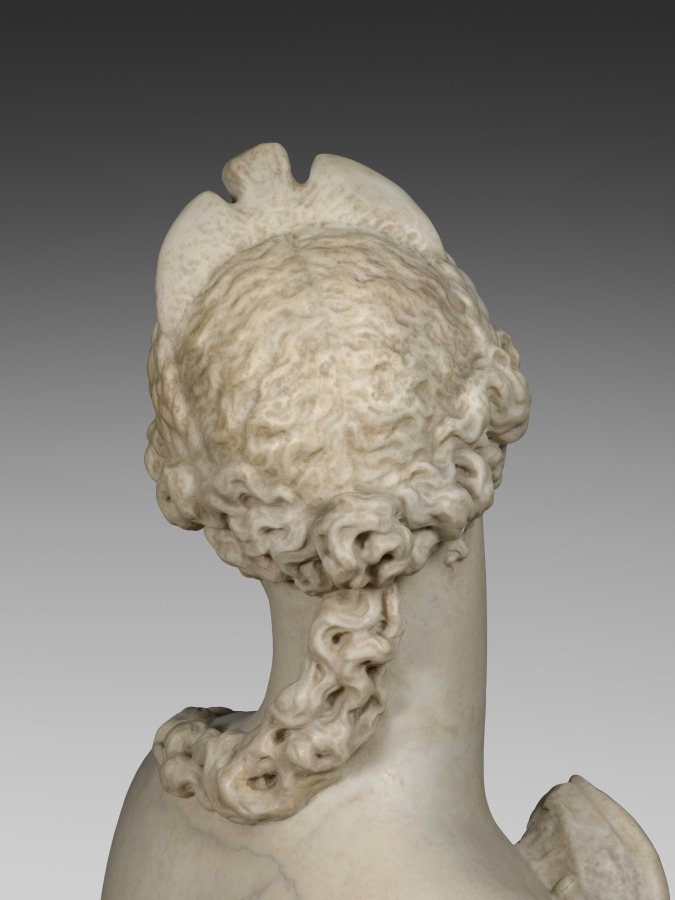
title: Fata Morgana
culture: Italy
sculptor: Giambologna (Flemish, active Italy, 1529–1608)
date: c. 1572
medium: Marble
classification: Sculpture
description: Commissioned by prominent banker Bernardo Vecchietti, whose surname means “old,” Fata Morgana took the name both of the nearby spring that fed the fountain she surmounted, and the legendary fairy who restored King Arthur’s youth. The Fata Morgana is one of only around a dozen sculptures in marble by Giambologna. The artist’s favorite subject was the female nude because of its capacity to showcase his extraordinary ability to model softness in hard stone and to convey dynamic movement. Her twisting pose invites the viewer to appreciate the Fata Morgana from every angle.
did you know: The sculpture originally appeared to emerge mysteriously from a cave within a constructed grotto.